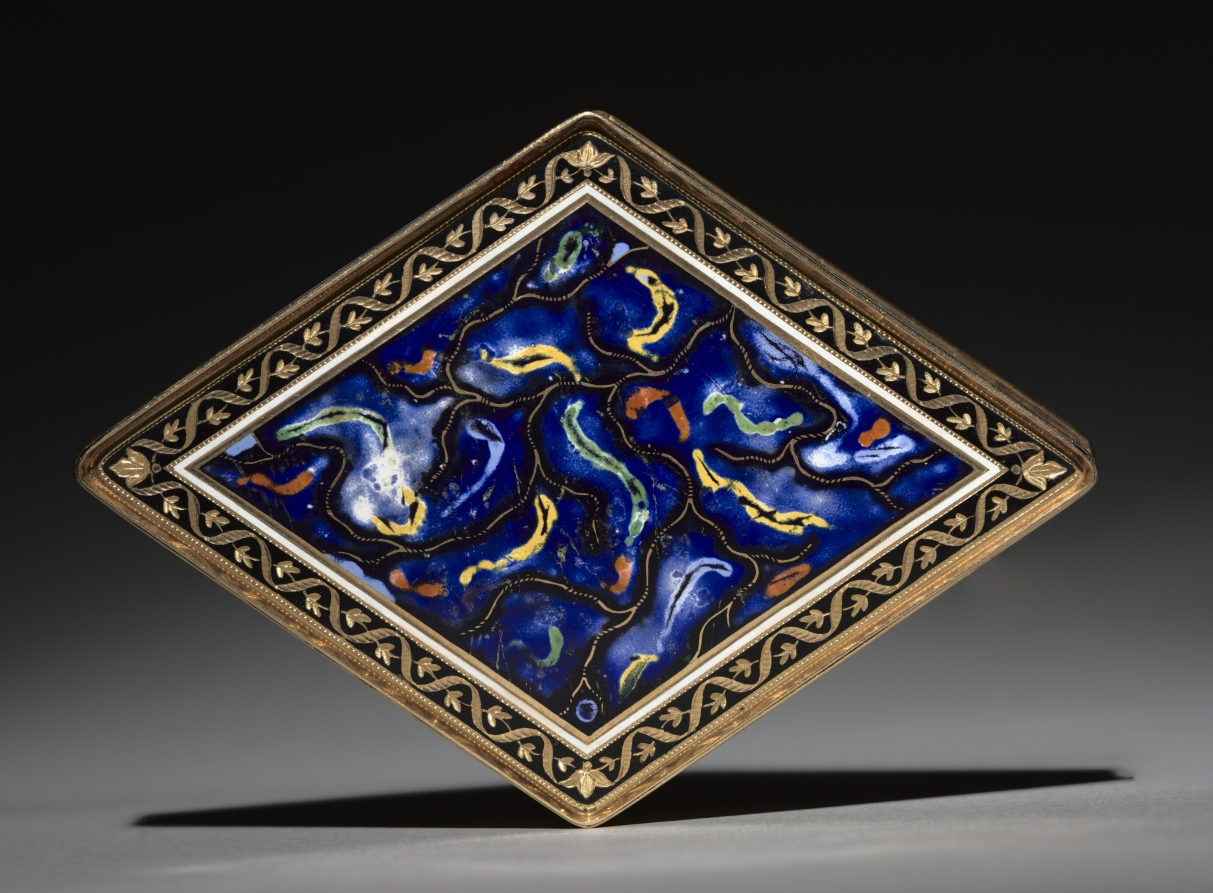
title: Box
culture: Switzerland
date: early 1800s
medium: gold and enamel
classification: Enamel